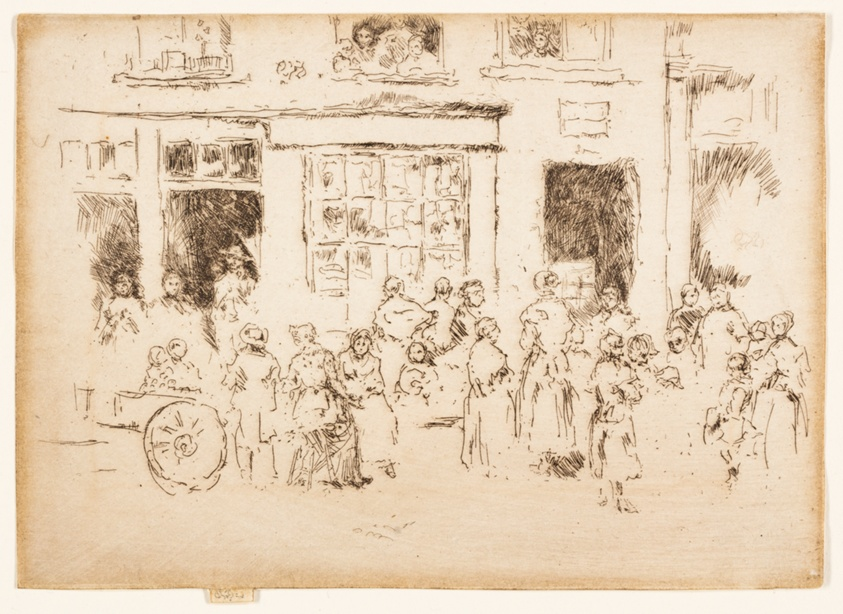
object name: Print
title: High Street, Brussels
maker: James McNeill Whistler (American, 1834-1903)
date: 1887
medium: Etching with foul biting in black ink on ivory laid paper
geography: United States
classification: etching; foul biting; print; prints and drawing; paper